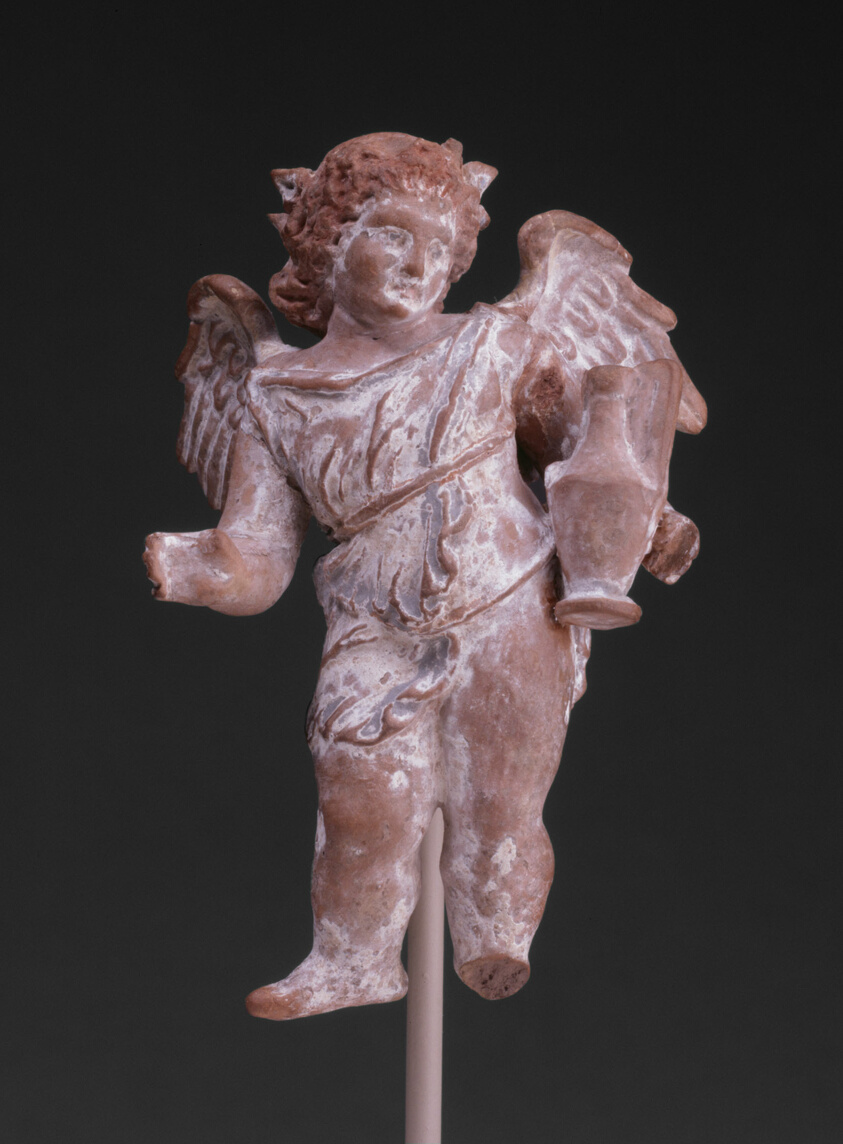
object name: Sculpture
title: Statuette of Eros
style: greek, ancient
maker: Greek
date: 3rd-2nd century BCE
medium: terracotta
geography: Greece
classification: earthenware; ceramics; sculpture; ancient art